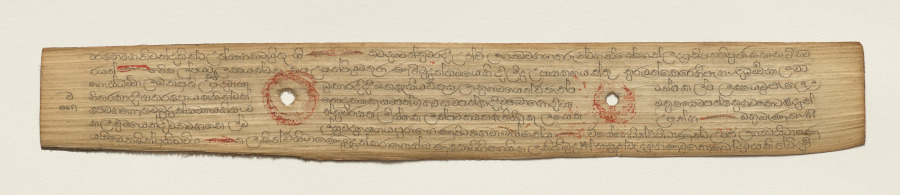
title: Leaf from a Buddhist Manuscript (recto)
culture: Sri Lanka, Singhalese, Late 17th century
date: c. 1700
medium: fiber paper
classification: Manuscript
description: Palm leaf material is still used for manuscripts in Sri Lanka. The palm leaves are prepared first by boiling them, drying them in the sun, and then rubbing them with oils. Scribes then use a metal stylus to incise the text. Then charcoal powder is wiped across the pages, filling in only the inscribed lines.